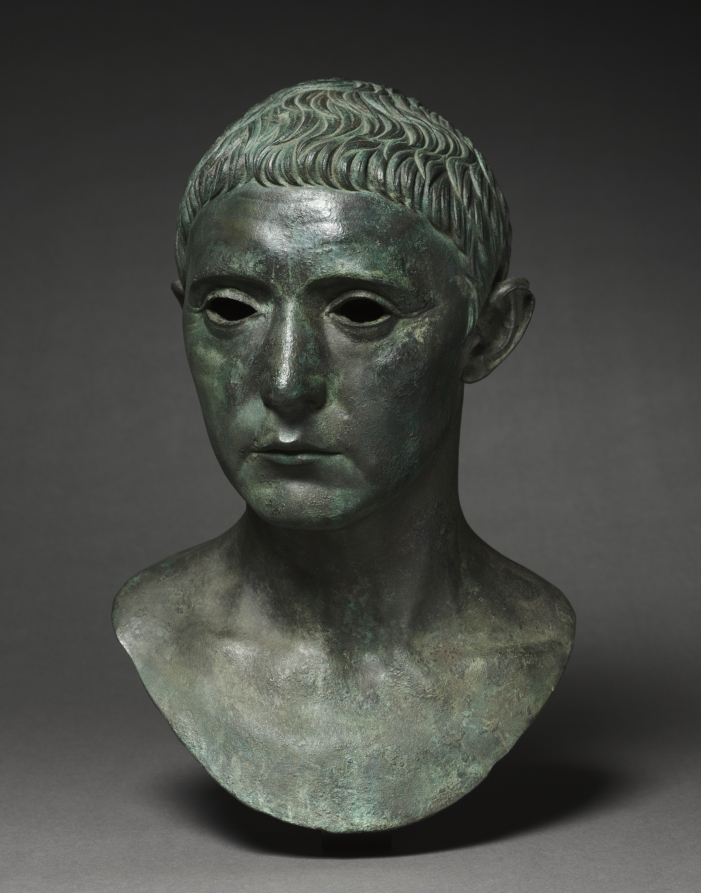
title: Portrait Bust of a Man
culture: Italy, Roman, Augustan period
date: 27 BCE–14 CE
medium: bronze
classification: Sculpture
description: The realistic features of this fine life-sized portrait include wrinkles in the forehead and beside each eye, and very naturalistic ears, protruding but not quite symmetrical. The stylized hair is neatly arranged and suggests a date in the Augustan period, although some scholars have seen it as late Republican. Likely once topping a shaft as a herm bust, the portrait’s subject—now unknown—would have been identified by an inscription.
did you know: This portrait originally had inlaid eyes, probably in stone, glass, or ivory.